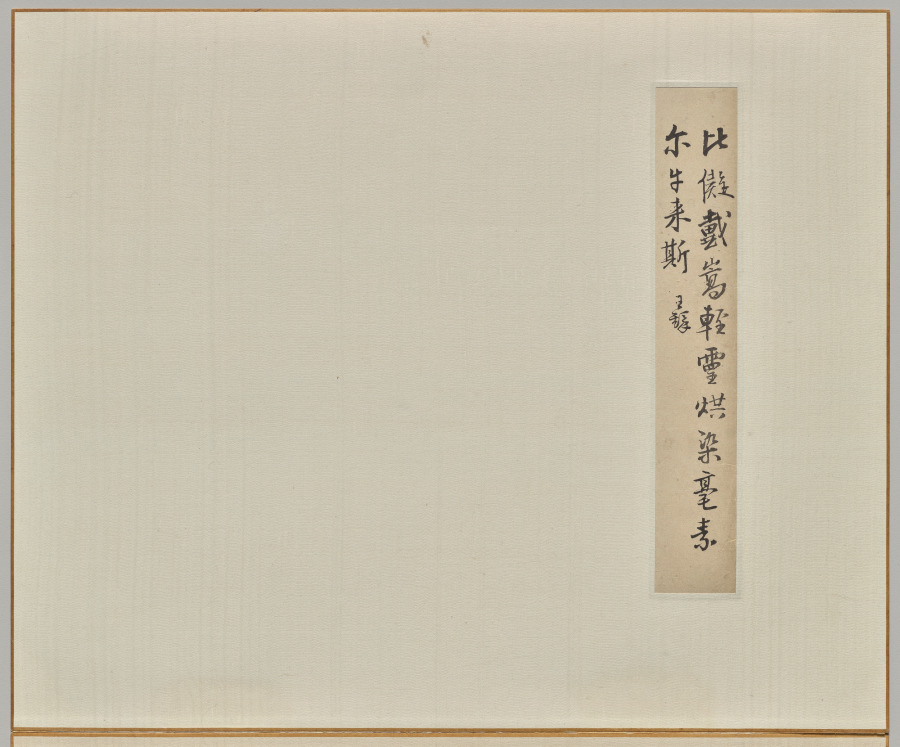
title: Man, Buffalo, and Calf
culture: China, Southern Song dynasty (1127-1279)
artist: Li You (Chinese, active c. 1145)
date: 1145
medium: album leaf; ink and color on silk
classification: Painting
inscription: Artist's inscription: 乙丑歲李祐/椿畫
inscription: 3 seals: 1 of Wu T'ing (c. 1600); 1 of An Kuo (1481–1534); 1 of Li Pao-hsün (1858–1915)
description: Here, a herdboy tending a cow with a calf is sitting beneath a tree with his pet myna bird. The painting can be read as a pastoral scene. As the water buffalo helped plow the fields, it was perceived as an animal that endures hard work without gain for itself, often interpreted as a metaphor for the official. Ox-herding pictures, presented as gifts in court circles, were used for their moral and political rhetoric. The Yijing (Book of Changes) states, The Receptive is the earth, the mother . . . it is a cow with a calf . . . the multitude [in relation to the ruler].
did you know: Li You included such tiny details as circular patterns of hair on the buffalo’s hindquarters.